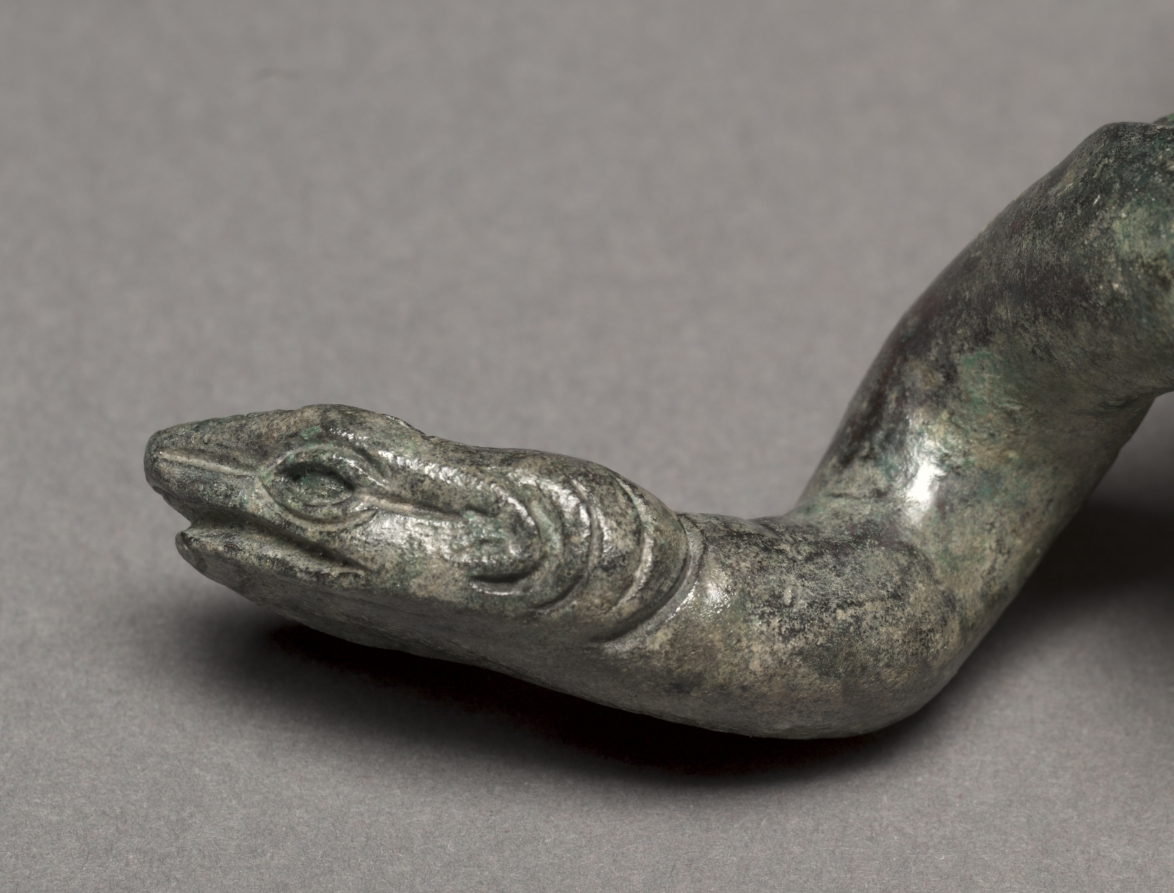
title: Detached Creature from the Cleveland Apollo: Apollo Sauroktonos (Lizard-Slayer) or Apollo the Python-Slayer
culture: Greece, Athens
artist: attributed to Praxiteles (Greek, Athenian, c. 400–330 BCE)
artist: or Follower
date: c. 350–200 BCE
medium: bronze, copper and stone inlay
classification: Sculpture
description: Both snakelike and lizardlike in appearance, the creature has a scaly head and four small feet. These are attached asymmetrically to its long and sinuous body, some with carefully delineated toes, others less detailed. The smallest foot falls behind a line bisecting the creature, where radiography shows a pin joining two separately cast sections. Although the bronze of the front and back halves is quite similar, the front half shows greater porosity (air bubbles). Perhaps the original back half was damaged during casting, necessitating a new or re-casting of that portion of the creature, with a smaller, relocated fourth leg.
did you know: Despite its small size, the creature was cast in two solid parts.